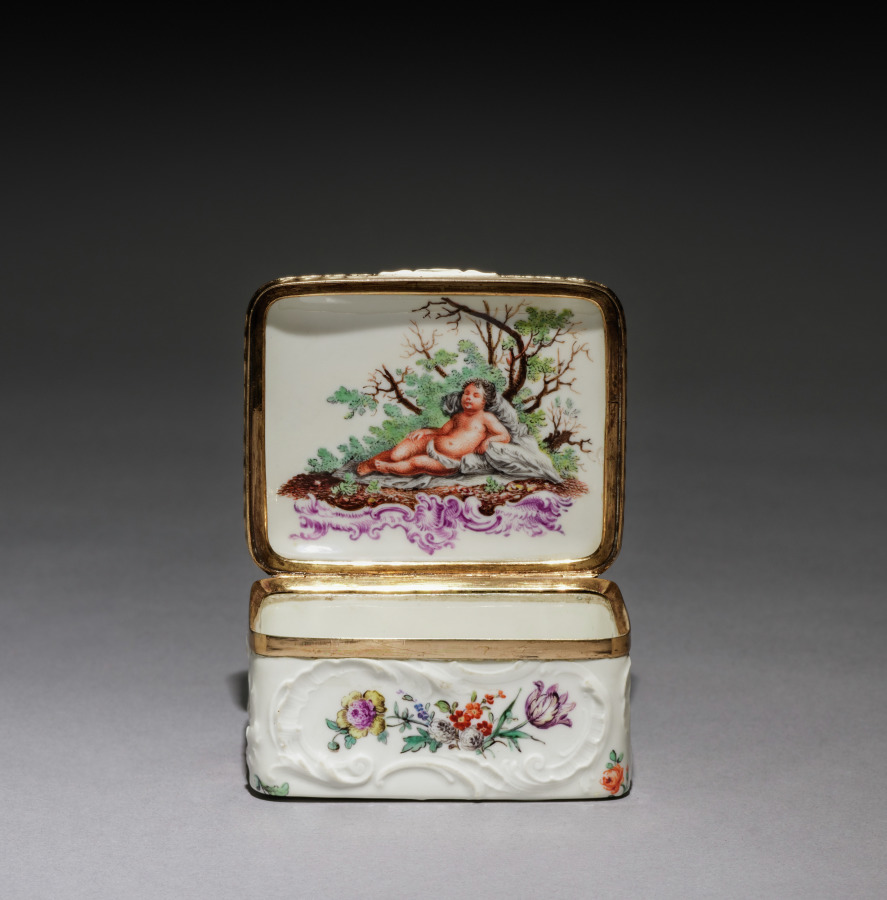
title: Box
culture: South Germany, 18th century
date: 1750–1775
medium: porcelain with silver-gilt mounts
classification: Miscellaneous